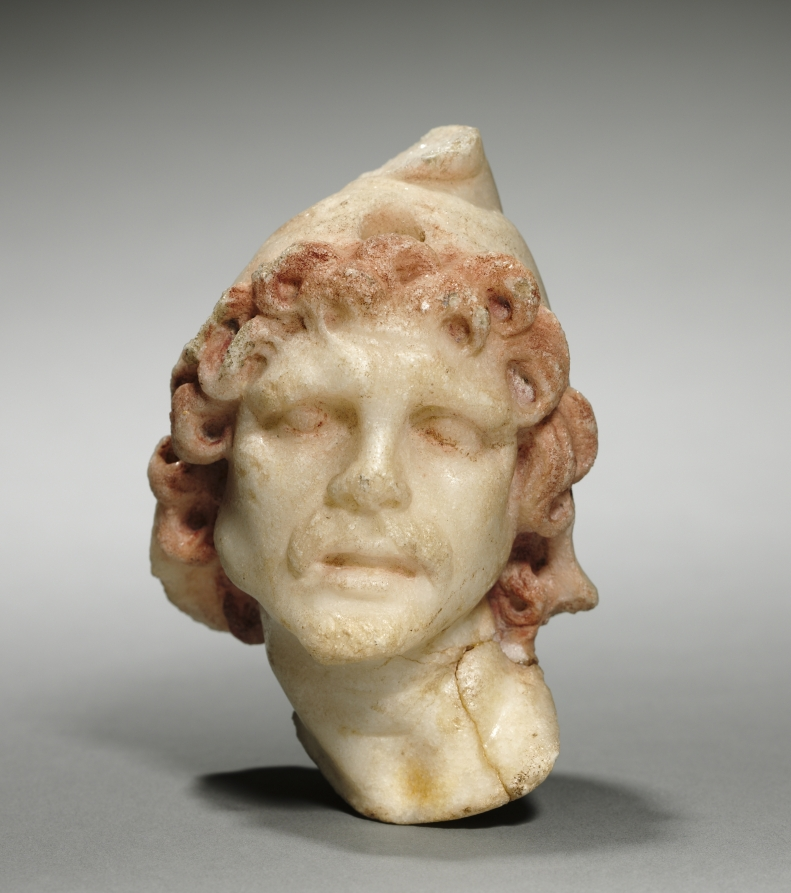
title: Head of a Foreign Warrior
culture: Greece, Alexandria or the Levant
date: 300–200 BCE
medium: marble with traces of paint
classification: Sculpture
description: This miniature head depicts a man with wild curls that still retain their original red pigment. He is immediately revealed as a non-Greek by his carved mustache, associated with Celtic tribes, and cone-shaped hat called a Phrygian cap, associated with eastern peoples such as the Persians. During the Hellenistic period, various non-Greek peoples served as mercenaries or fought against the Greek kingdoms, and these foreign warriors were depicted extensively in art.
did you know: There is a small notch below the cap's crest that likely held an attachment, now lost.